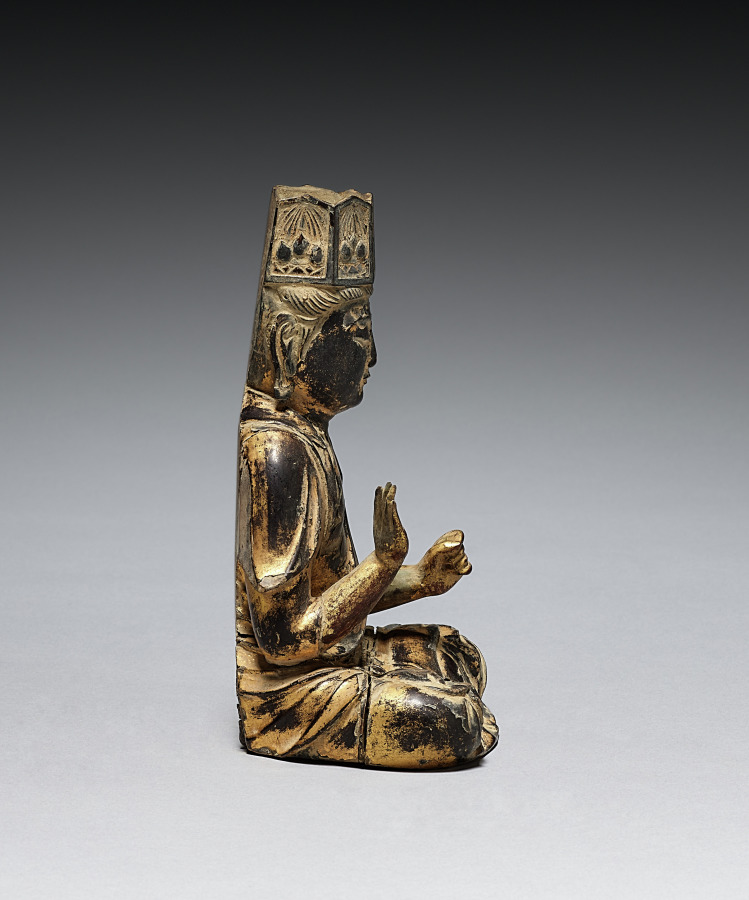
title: Bodhisattva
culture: Japan, Heian period (794–1185)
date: 900s-1100s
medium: gilded wood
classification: Sculpture